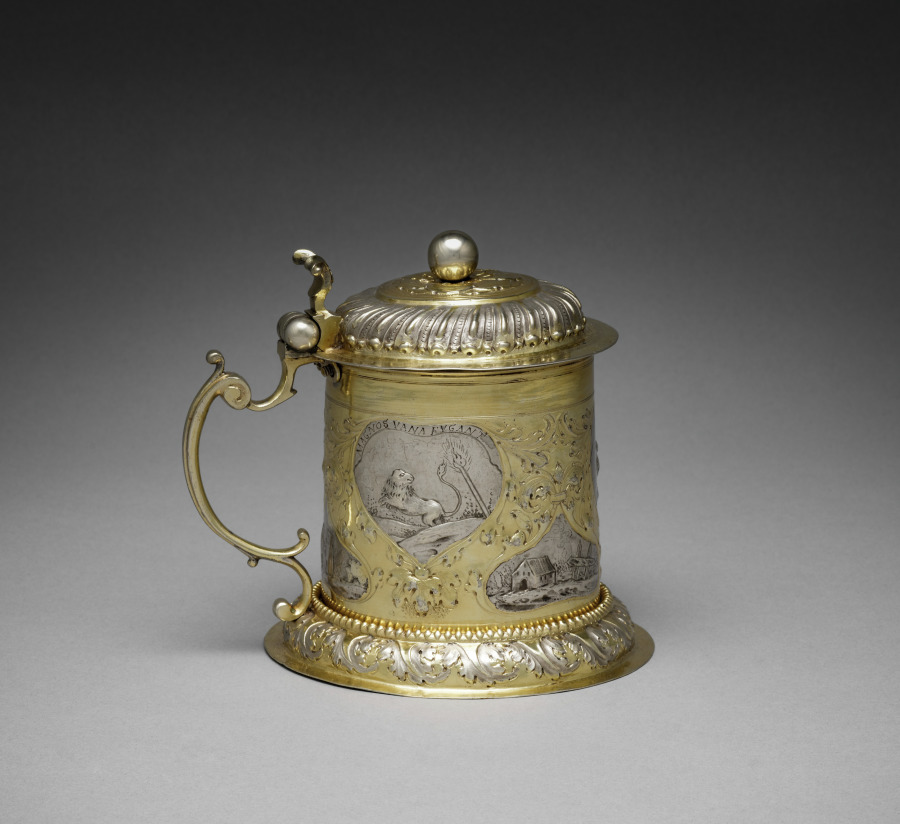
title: Tankard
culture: Germany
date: 1600s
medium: silver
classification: Silver